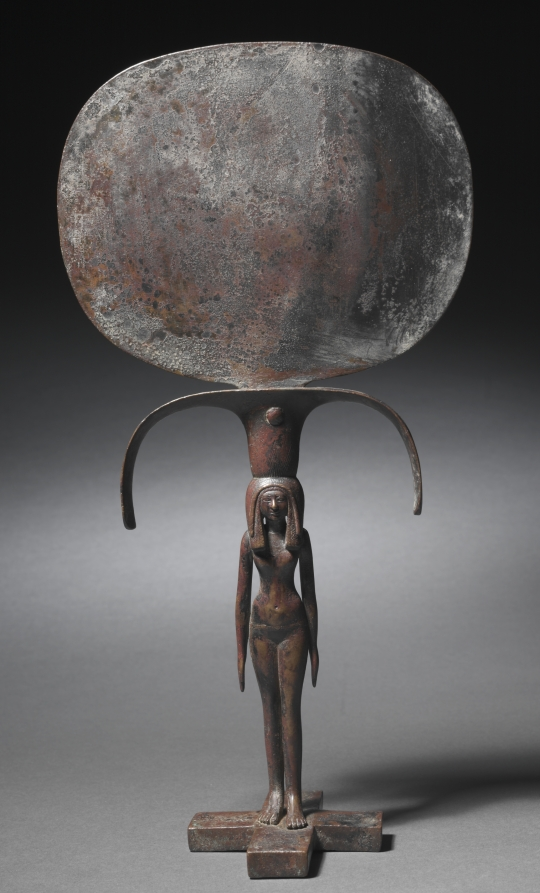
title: Caryatid Mirror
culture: Egypt, New Kingdom (1540–1069 BCE), Dynasty 18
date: c. 1540–1296 BCE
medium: bronze with black copper inlay?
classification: Cosmetic Objects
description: This superb mirror has an oval disk and a handle in the form of a nubile young girl, entirely naked except for her elaborately braided tripartite wig, broad collar, and a girdle of wallet beads. She stands on a cruciform base, with her left foot slightly advanced and her hands at her sides. On her head and supporting the disk is a papyrus umbel with flaring tips. Mirrors with handles in the form of naked young girls were the height of fashion in mid-Dynasty 18; numerous examples exist. This mirror is perhaps the finest of its kind. The cruciform base is unusual, if not unique. The iconography is understandable in relation to the goddess Hathor, the embodiment of love and beauty. A multifaceted goddess, she was equated with Aphrodite by the Greeks. The retinue of Hathor consisted precisely of such beauties, called nefrut in Egyptian, and the mirror itself, that reflection of beauty, appears to have had Hathorian connections from early times.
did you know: When they were made, this mirror was polished to a brilliant shine; the marvelous colored patina it has since acquired is the result of being buried for years in the ground.